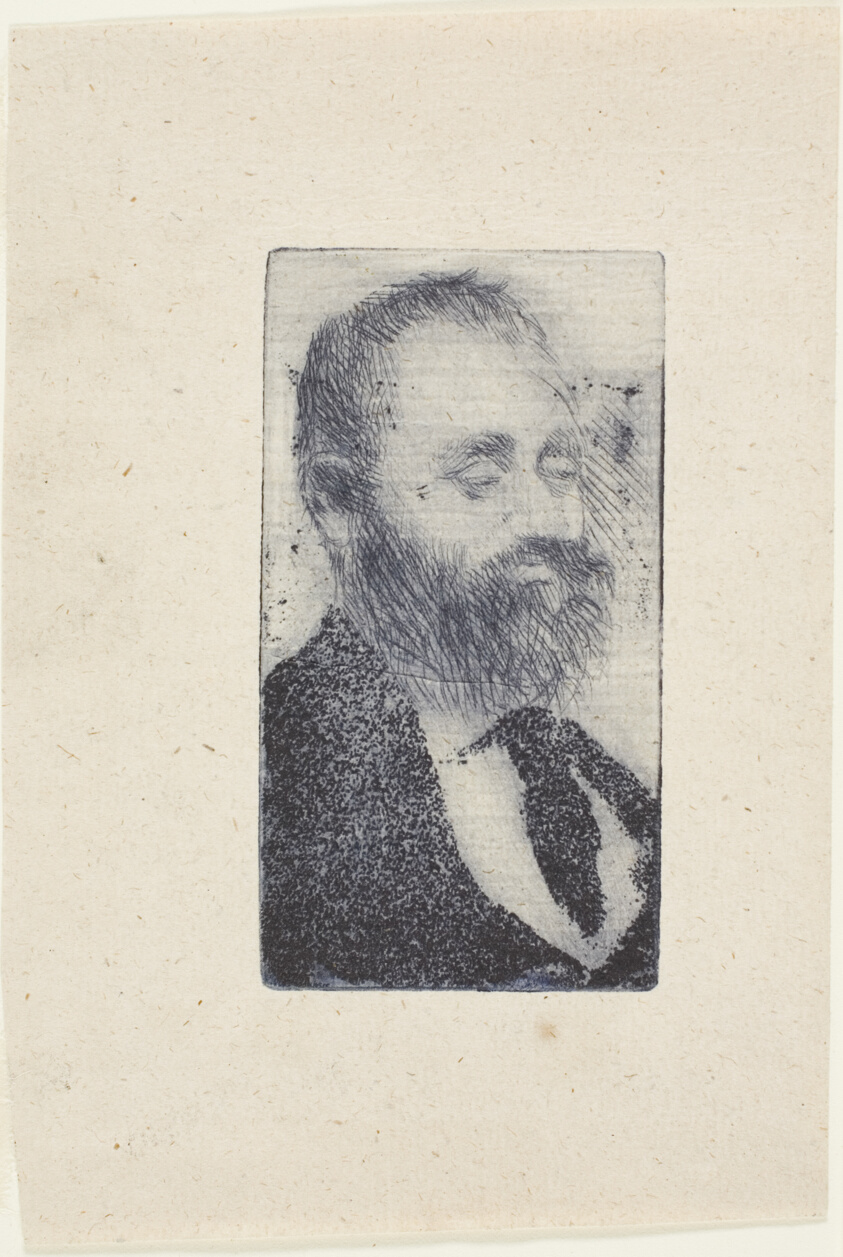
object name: Print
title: Alphonse Hirsch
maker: Edgar Degas; French, 1834-1917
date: February 20, 1875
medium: Drypoint and aquatint in blue on oatmeal laid paper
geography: France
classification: drypoint; print; prints and drawing; paper